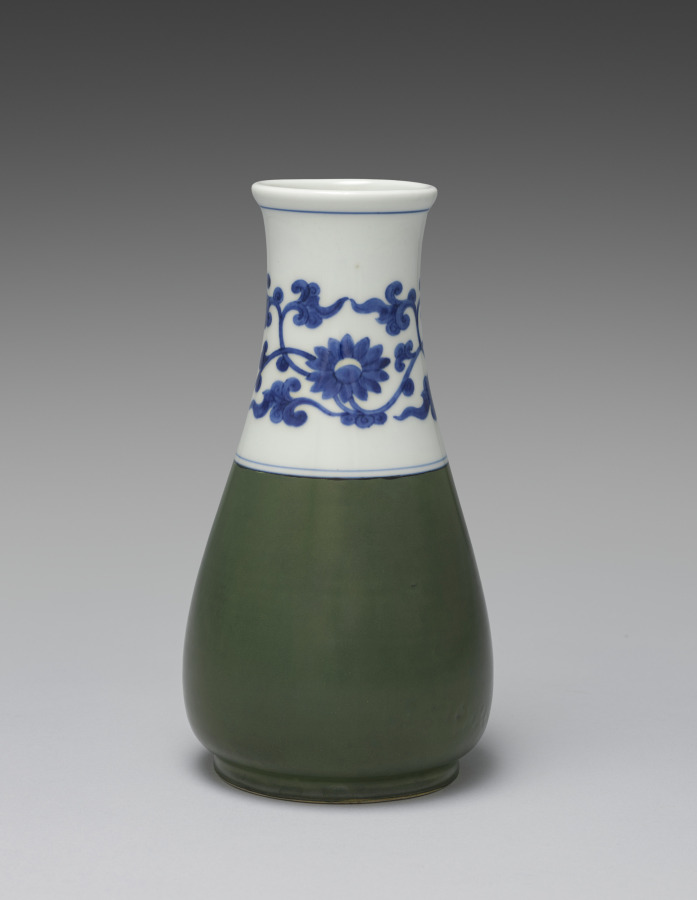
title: Flower Vase with Floral Scroll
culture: Japan, Meiji period (1868–1912)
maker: Seifū Yohei III (Japanese, 1851–1914)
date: 1893–1914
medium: Porcelain with underglaze colors and green glaze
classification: Ceramic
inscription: 清風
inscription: 帝室技芸員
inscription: 金聲玉振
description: The upper part of this vase is painted in underglaze blue with a floral scroll of leaves accentuated with a single chrysanthemum motif on each face and bound at top and bottom with single blue lines. The box lid for the vase is short on detail; the inscription notes only that it is a flower vase with underglaze blue. It is possible that the box is a mismatch because the inscription does not mention the vase’s more distinctive feature: the deep green glaze on its lower half, which is seen much less frequently among Yohei III’s works. This glaze may be an example of a dark green porcelain glaze called rōkanji, which the artist invented in 1892. The name of the glaze comes from Chinese, in which it is pronounced langgan. It may literally mean “tinkling sound of jade” and could refer to malachite, among other proposed identifications.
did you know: The center of each chrysanthemum has a crescent-shaped design at the top filled with a very pale yellow wash under the transparent glaze.